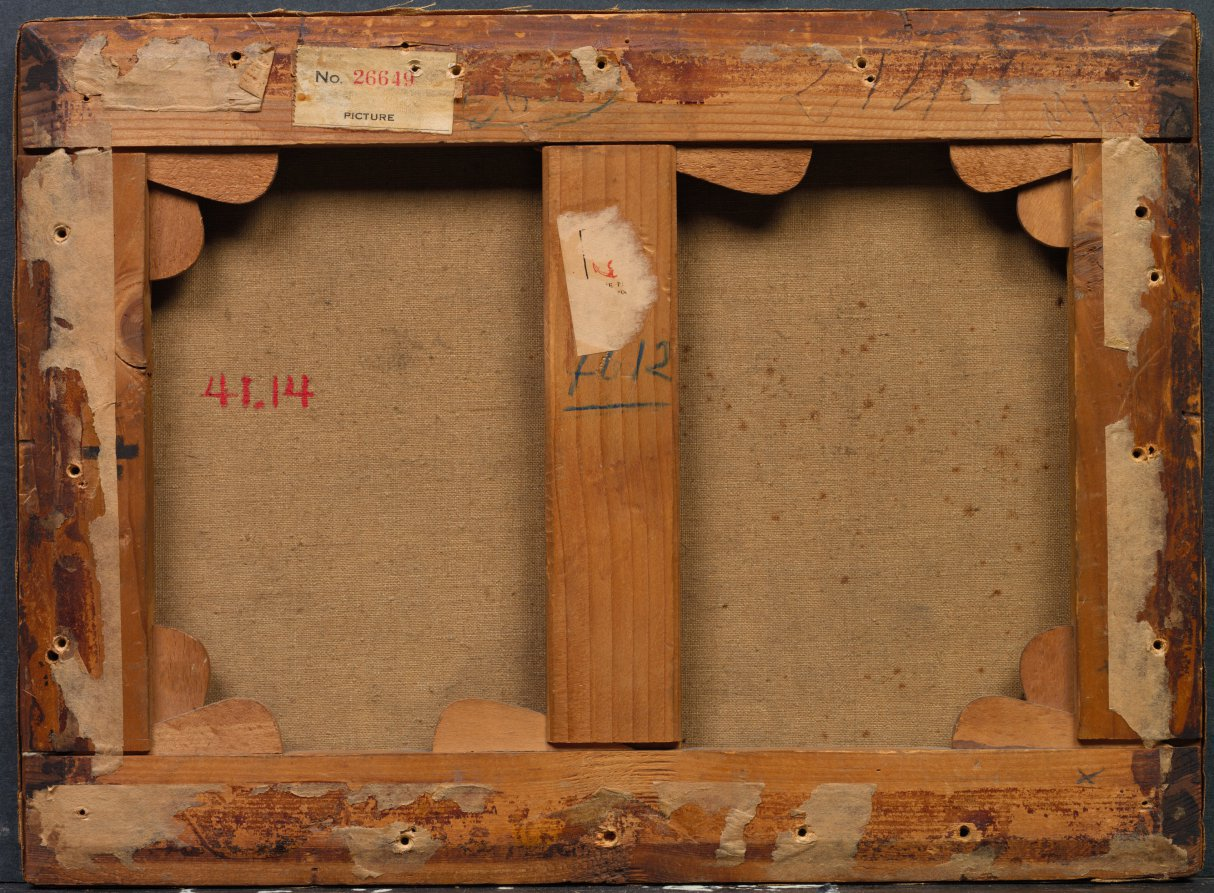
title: Roses in a Vase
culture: France, 19th century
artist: Pierre-Auguste Renoir (French, 1841–1919)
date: c. 1890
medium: oil on fabric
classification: Painting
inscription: Signed lower left: Renoir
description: The palette Renoir used to depict the seven roses in this still life ranges from various shades of red to warm whites, light yellows, and pinks. The artist declared, "'Painting flowers lets my brain rest. It does not cause the same tension of spirit as when I face a model. When I paint flowers, I put down tones, I boldly try values, without having to worry about losing a canvas.'" He was particularly fond of roses, whose full, rounded shapes he likened to the female body. In 1861, Renoir met Claude Monet (1840–1926) and later shared a studio with him. Monet became an important influence on Renoir's art, as can be seen here in the rapid brush strokes, thinly scuffled background, and buildup of paint (impasto) in the blooms.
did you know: Renoir was an excellent singer who wanted to be a musician, but for financial reasons left school at age thirteen to work as an apprentice painter in a porcelain factory.